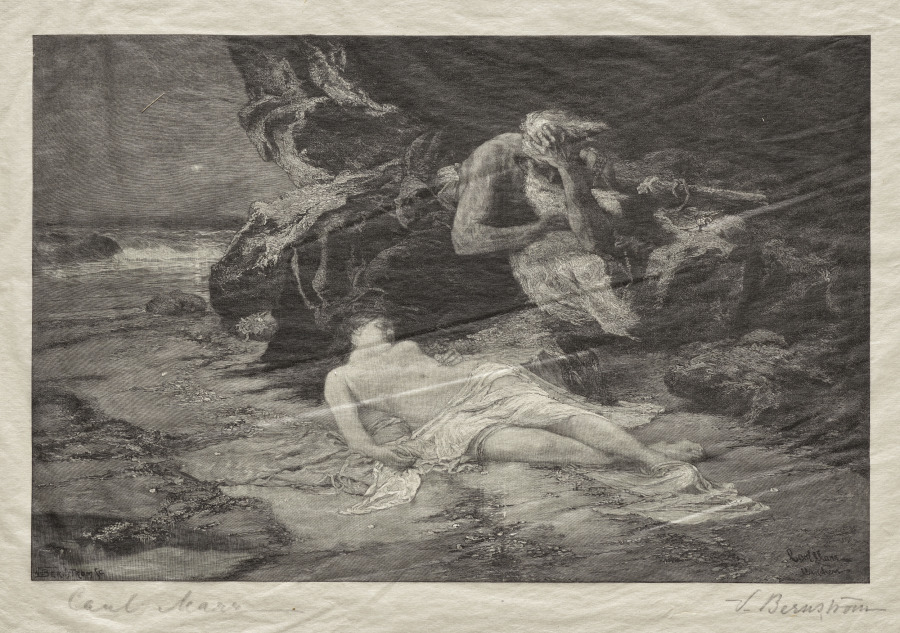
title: The Mystery of Life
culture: America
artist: Victor Bernstrom (American, 1845–1907)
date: 1887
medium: wood engraving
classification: Print